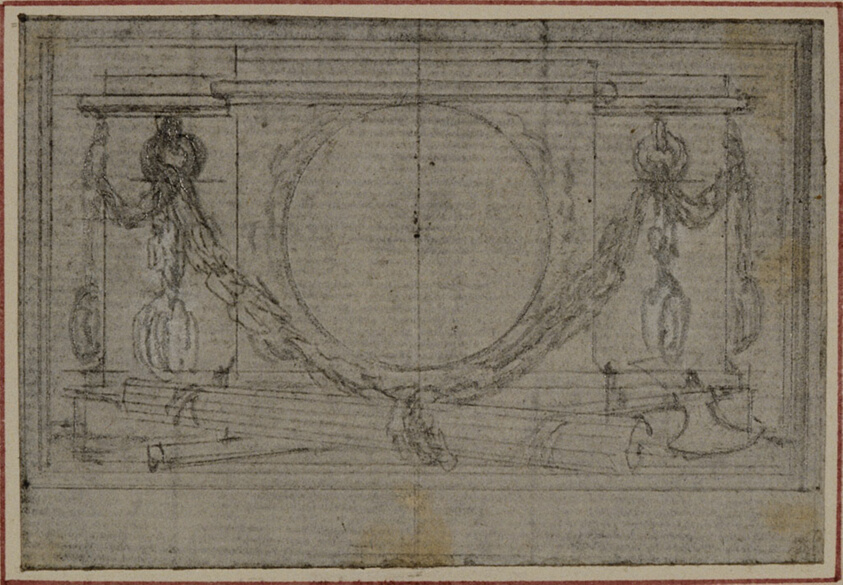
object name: Drawing and Watercolor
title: Study for En Tête Vignette in Tacitus "Tibère, ou Les Six Premiers Livres des Annales", Book II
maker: Hubert François Gravelot (French, 1699-1773)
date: c. 1768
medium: Graphite, on gray laid paper, incised for transfer, and perimeter mounted on ivory laid paper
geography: France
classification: graphite; drawings (visual works); prints and drawing